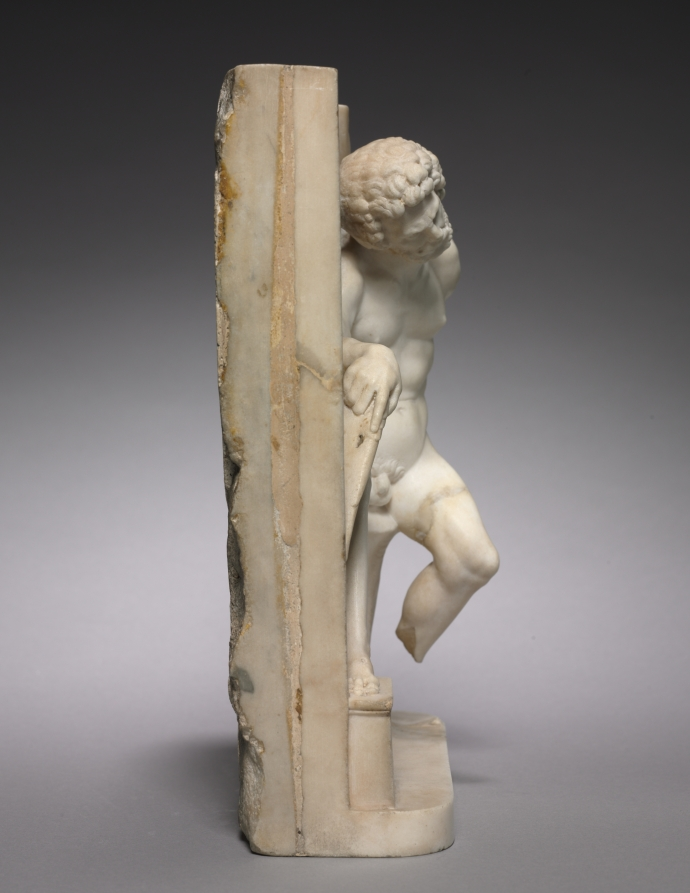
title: Philoctetes on the Island of Lemnos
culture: Italy, 16th century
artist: workshop of Giovanni Maria Mosca (Italian, 1495/99–1574)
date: c. 1510–1515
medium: marble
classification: Sculpture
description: A snake bit the Greek warrior Philoctetes en route to the Trojan War. The stench of the infected wound led the ship’s crew to abandon him on the island of Lemnos, where he fans the agonizing injury with a bird’s wing. The warrior’s noble suffering in the face of tremendous pain would have been a classical model of stoic composure, highly valued in Renaissance court culture.